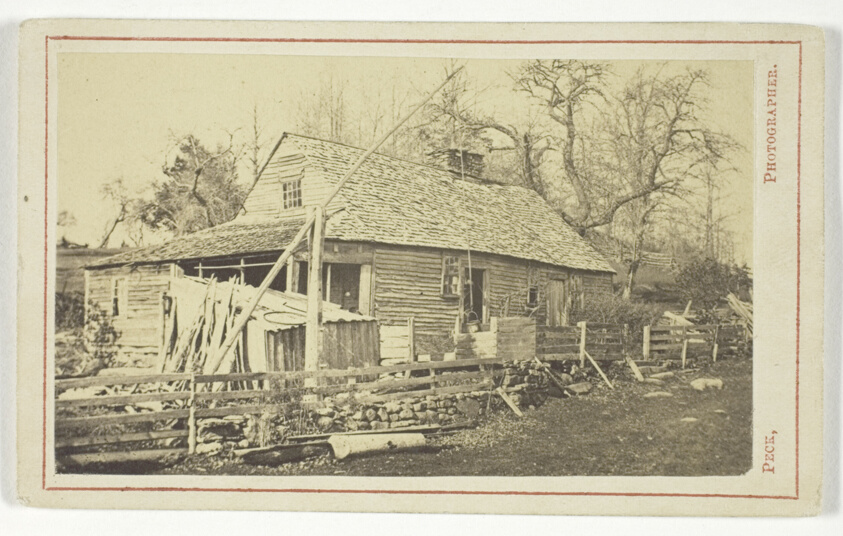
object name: Photograph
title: Untitled (Cabin with well)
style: 19th century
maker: Henry S. Peck (American, active 1860s)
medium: Albumen print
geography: United States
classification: photographic process; photography; card photographs; photograph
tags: Collected by Hugh Edwards